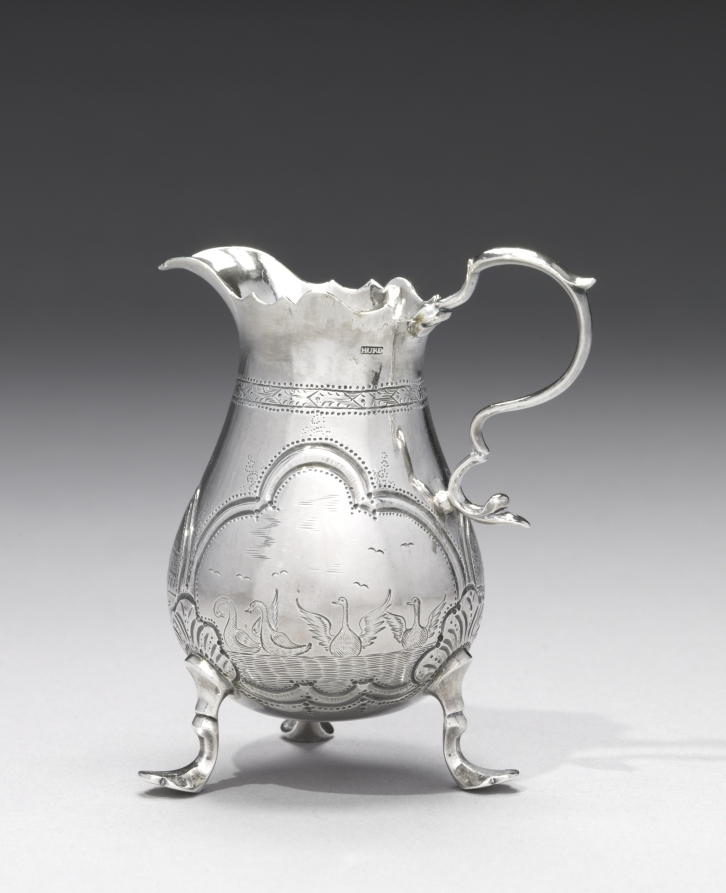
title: Cream Jug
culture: America, Massachusetts, Boston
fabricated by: Jacob Hurd (American, 1702–1758)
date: 1740–50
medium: silver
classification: Silver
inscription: engraved: coat of arms on front of body, underneath spout, and ECP (later) in script on bottom.